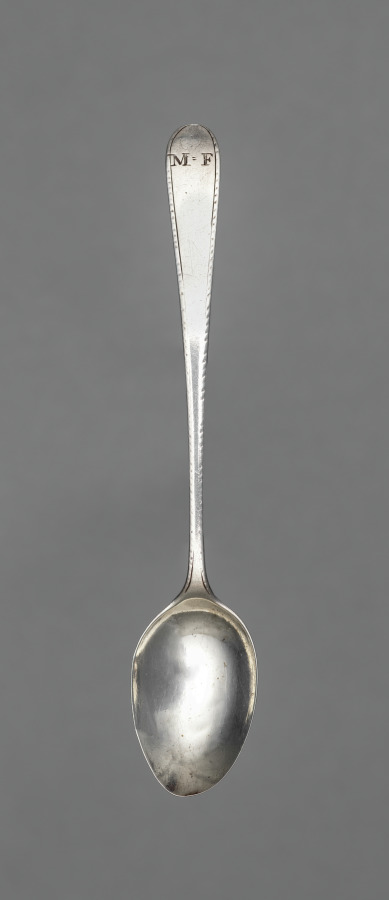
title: Teaspoon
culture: America, New Hampshire, Portsmouth, 18th century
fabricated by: Samuel II Drowne (American, 1749–1815)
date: c. 1770–1780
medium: silver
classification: Silver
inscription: engraved "M=F" in shaded block letters on top of handle end.